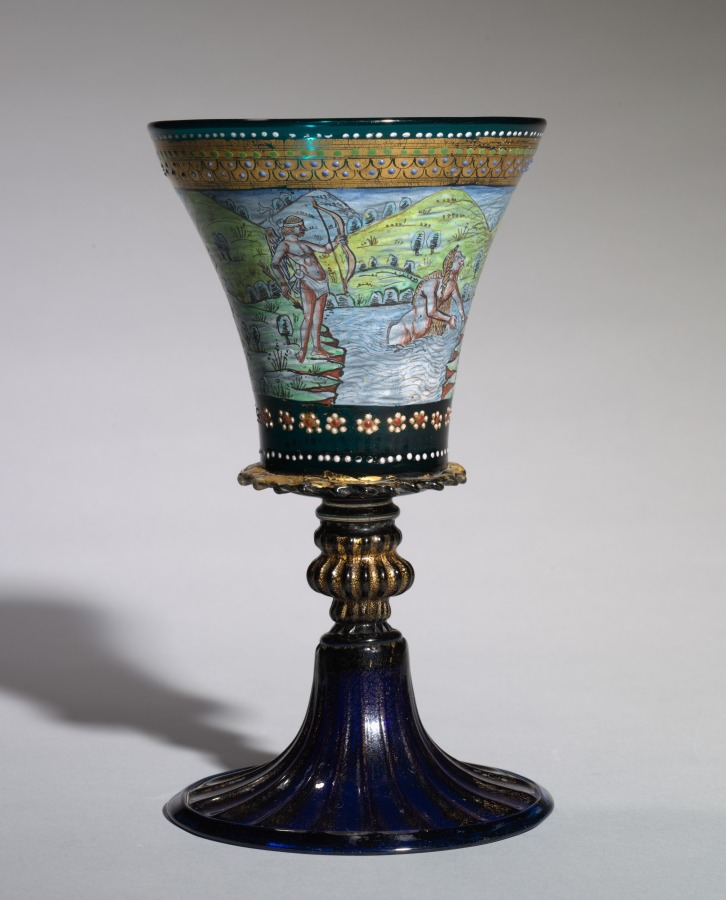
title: The Peddler Goblet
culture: Italy, Venice (Murano), 19th century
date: 1800s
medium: green and blue glass, enameled and gilded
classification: Glass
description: In the decoration of this goblet, the peddler, fast asleep under a tree, is robbed by monkeys. The same subject appears on the famous "Monkey Cup" in The Cloisters of The Metropolitan Museum of Art. It was obviously appealing because peddlers were traditionally believed to have many of the same vices as monkeys. Another part of the decoration includes a scene of Venus emerging from the sea, and the Three Graces.